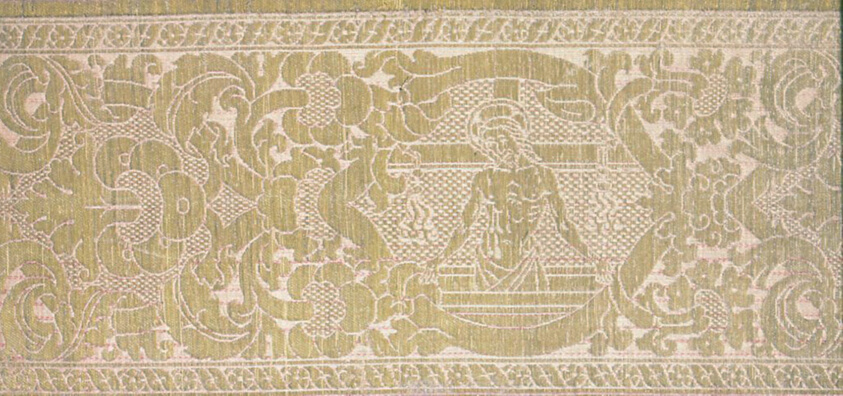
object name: Textile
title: Fragment (From an Orphrey Band)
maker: Italy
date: 15th century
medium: Silk, gold gilt strip wound around silk fiber core, integrated compound-weave of warp-float faced satin weave and twill weave with supplementary patterning wefts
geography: Italy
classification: textile; weaving; costume; liturgical